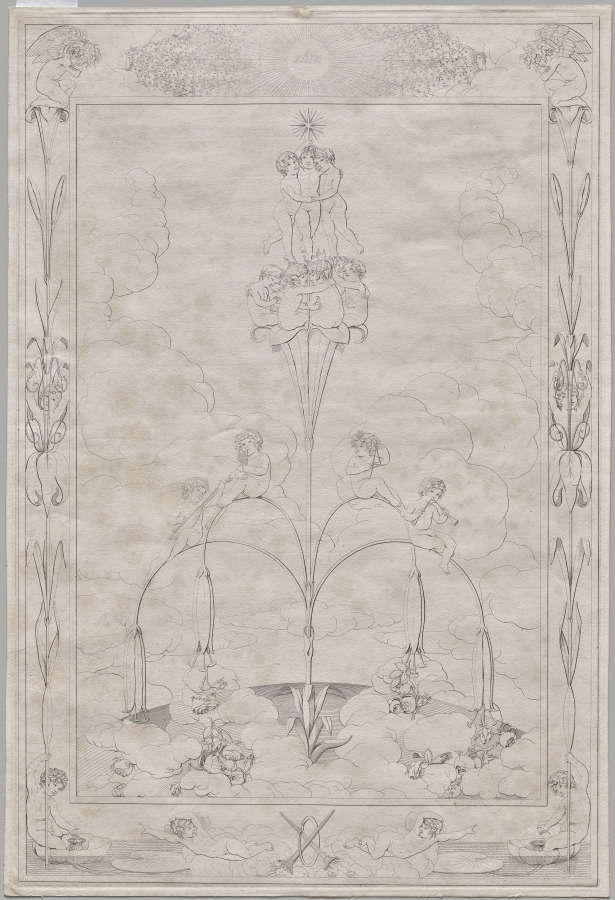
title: Morning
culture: Germany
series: Times of Day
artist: Philipp Otto Runge (German, 1777–1810)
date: 1803–5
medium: etching on heavy wove paper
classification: Print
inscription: Written in pencil on mat: "Morgen"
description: Phillip Otto Runge’s large-scale, four-part print series, Tageszeiten (Times of Day), is a landmark of German Romantic printmaking, capturing the “new art” promoted by Runge and his contemporary, Caspar David Friedrich, one rooted in a more personal and spiritual response to nature. Runge presents allegories of nature as a means to understand God and the sublime on earth. His four-part series represents not only the four times of day but also the seasons and the stages of human life, while contrasting eternal time with human time through various literary and religious references. Viewing the series from Morning to Night, seedlings emerge from the earth, bloom, decay, and die. Young spirits or children are born, mature, and grow old, eventually entering a sleep reminiscent of death. A female figure appearing in two scenes, possibly Mother Nature, inspires abundance and then embraces its decline, suggesting nature’s continuity despite human mortality. In each plate, Runge contrasts eternal time with human time, or spirituality with physicality, by contrasting the iconography in the borders with that in the centers.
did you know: After receiving a set of Times of Day as a gift from the artist, the German author Johann Wolfgang von Goethe (1749–1832) apparently exclaimed, “it’s enough to drive you crazy—beautiful, and mad at the same time!”